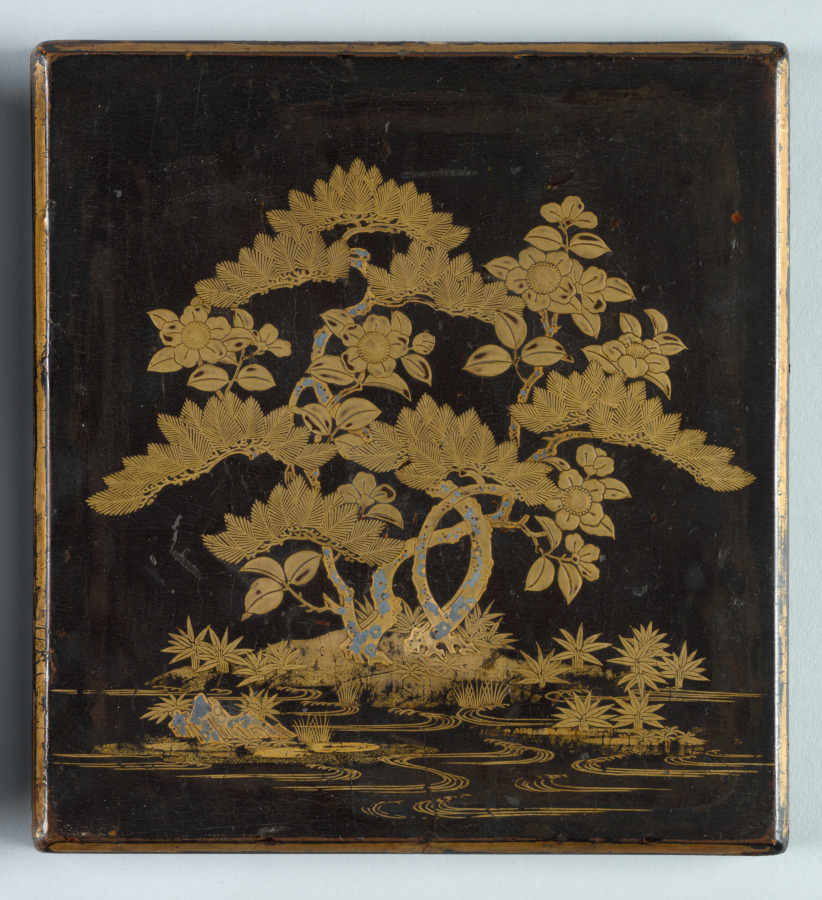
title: Writing Box (Suzuribako) with Design of Pine, Camellia, and Bamboo (lid)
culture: Japan, Muromachi period (1392–1573)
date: 1400s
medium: Lacquered wood with gold and silver sprinkled powder (maki-e)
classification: Lacquer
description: Writing boxes were indispensible personal possessions for the literate of medieval Japan. Beyond containing the tools for artistic expression and communication such as an ink stone, writing brushes, and a water dropper, writing boxes often featured scenes from classical literature or symbolic motifs rendered in a wide array of complex lacquer techniques.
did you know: The combination of pine, bamboo, and plum is a common seasonal motif; here the plum is replaced with camellia.